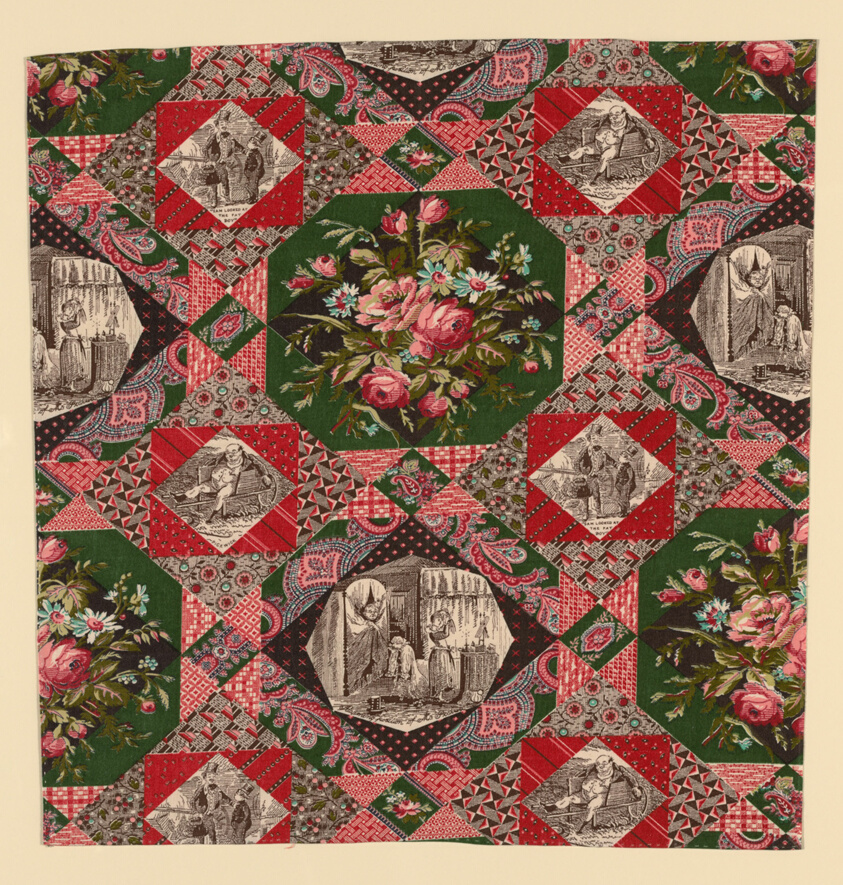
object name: Textile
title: Fragment (Furnishing Fabric)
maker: After works by Hablot Knight Brown ("Phiz") (English, 1815–1882); England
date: After 1874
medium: Cotton, plain weave; roller and engraved roller printed; glazed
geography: England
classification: textile; weaving - printed; furnishing textile